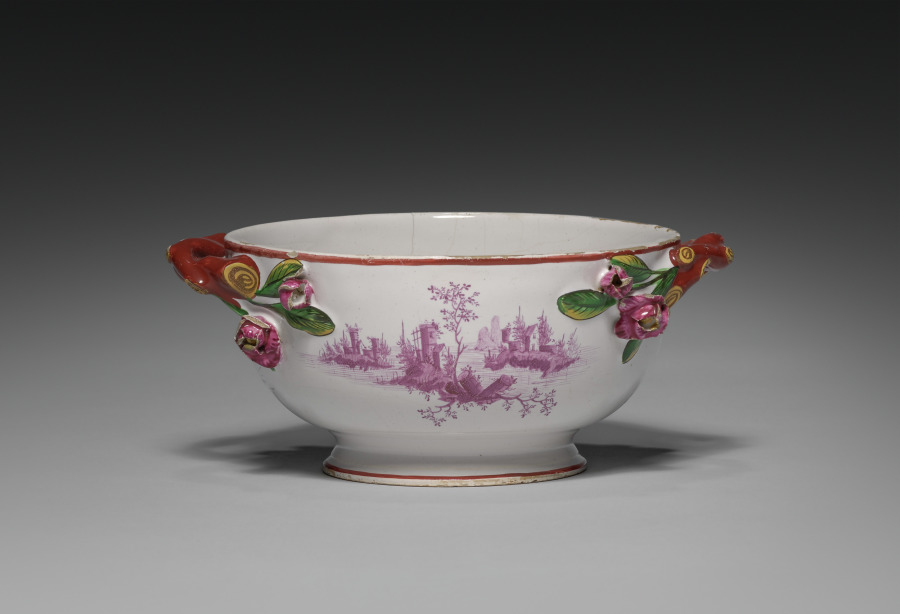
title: Bowl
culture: France, 18th century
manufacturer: Saint-Clément Factory (French)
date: c. 1775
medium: tin-glazed earthenware (faience) with enamel decoration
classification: Ceramic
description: The faience factory at Saint-Clément in eastern France closely imitated the styles and techniques employed by the Hannong's at Strasbourg. The monochrome landscapes in red on this covered bowl demonstrate the influence of German, in this case Meissen, porcelain on the faience made in this part of France.